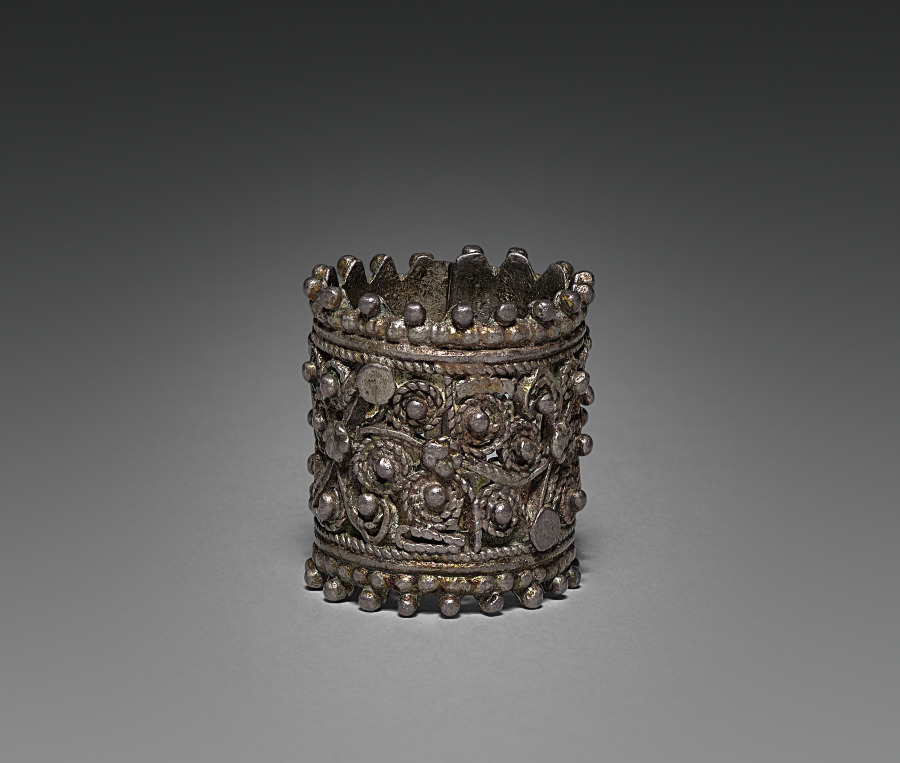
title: Ring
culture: India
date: early 1900s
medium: silver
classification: Jewelry